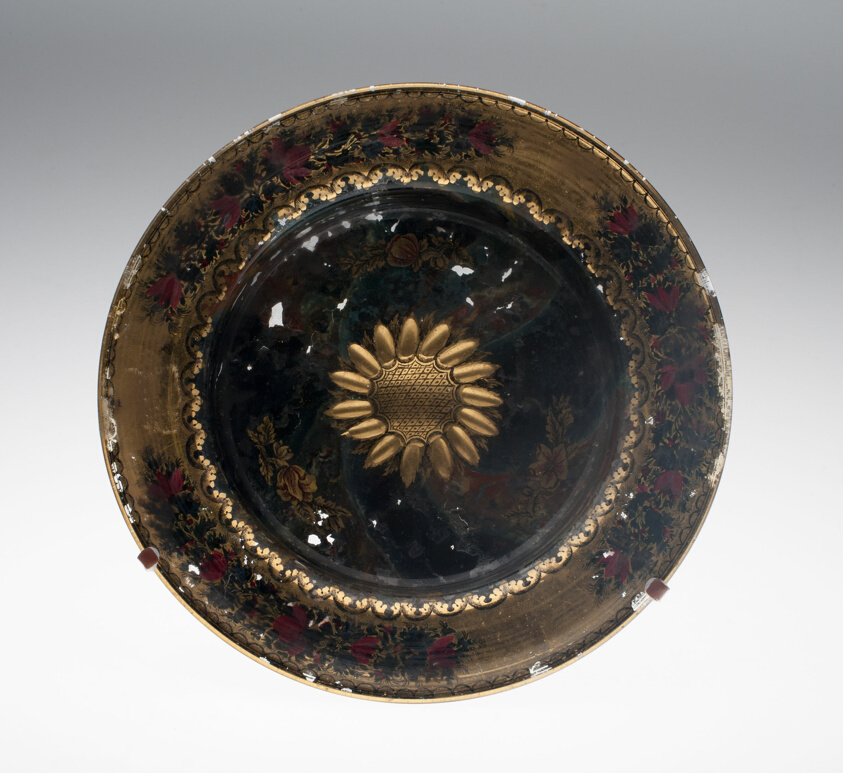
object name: Glass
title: Plate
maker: Germany, Schleswig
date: c. 1720/30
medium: Glass with gilding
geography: Schleswig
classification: plate (general, dish); glass; dish (vessel); european decorative arts